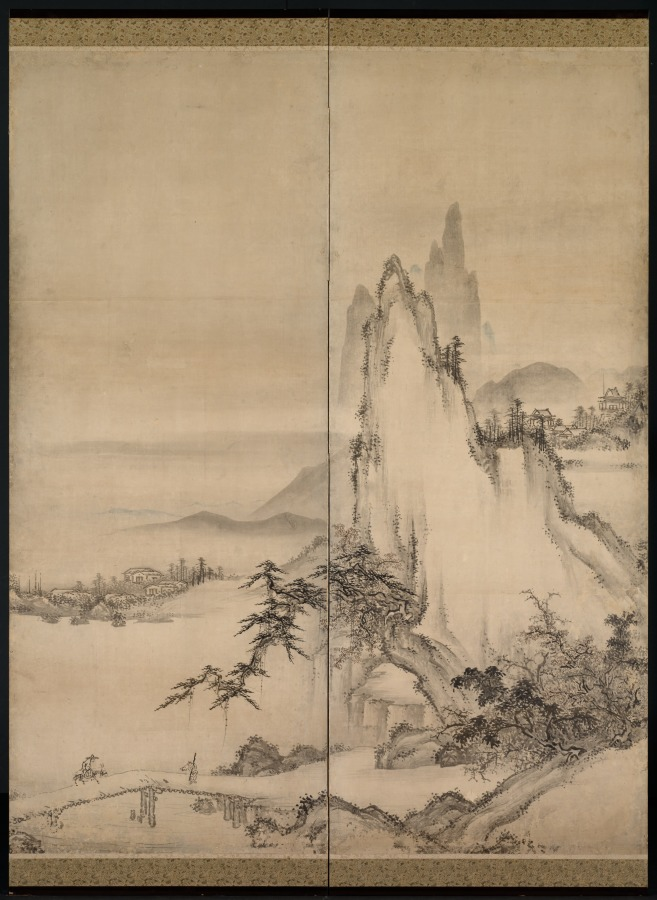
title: Chinese Landscape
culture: Japan, Muromachi period (1392–1573)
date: 1500s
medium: One of a pair of six-fold screens; ink and slight color on paper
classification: Painting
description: In a panorama of mountains and expanses of water, three gentlemen have assembled by moonlight to enjoy one another’s company away from a bustling village. An influx of ink paintings from China in both album and scroll formats beginning in the late 1200s inspired Japanese artists to create landscapes based upon Chinese prototypes. Later, Japanese painters adapted the imagery to the larger format of folding screens, which were used to define spaces in large rooms.